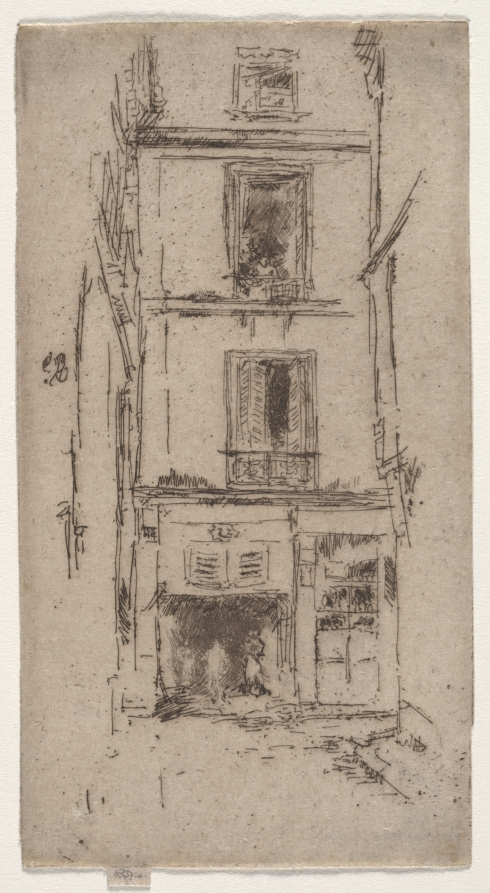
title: Rue des Bons Enfants, Tours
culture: America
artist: James McNeill Whistler (American, 1834–1903)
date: 1888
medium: etching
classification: Print